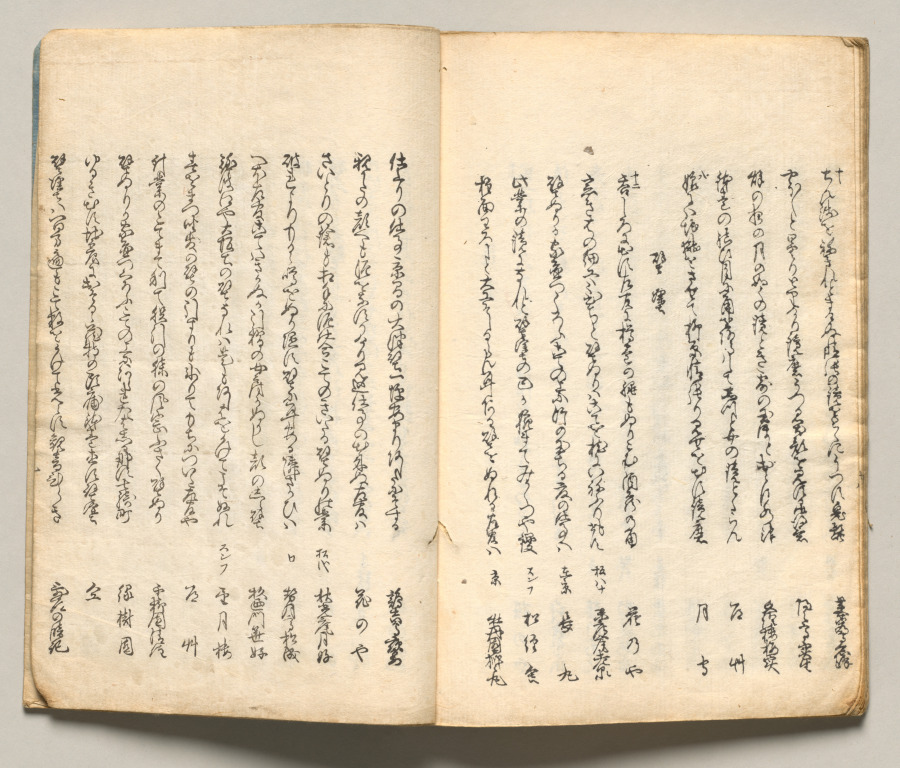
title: Spread Seventeen from Volume Seven of People of Japan in Light Verse (Kyōka)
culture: Japan, Edo period (1615–1868)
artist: Utagawa Hiroshige (Japanese, 1797–1858)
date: 1857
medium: Woodblock-printed book; ink and color on paper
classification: Bound Volume